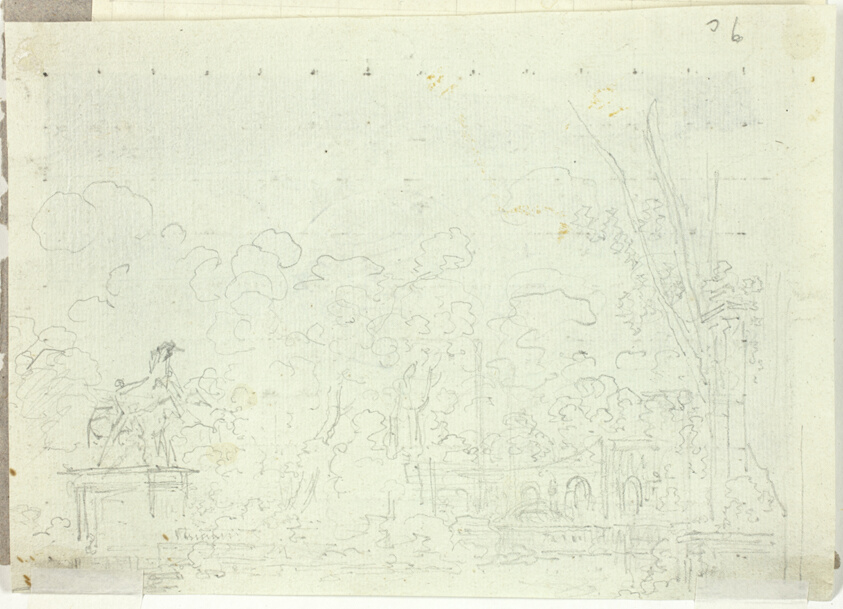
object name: Drawing and Watercolor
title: View of the Park at Versailles: Equestrian Statue Among Trees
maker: Pierre Antoine Mongin (French, 1761-1827)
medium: Graphite on pale greenish-gray laid paper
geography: France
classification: drawings (visual works); prints and drawing